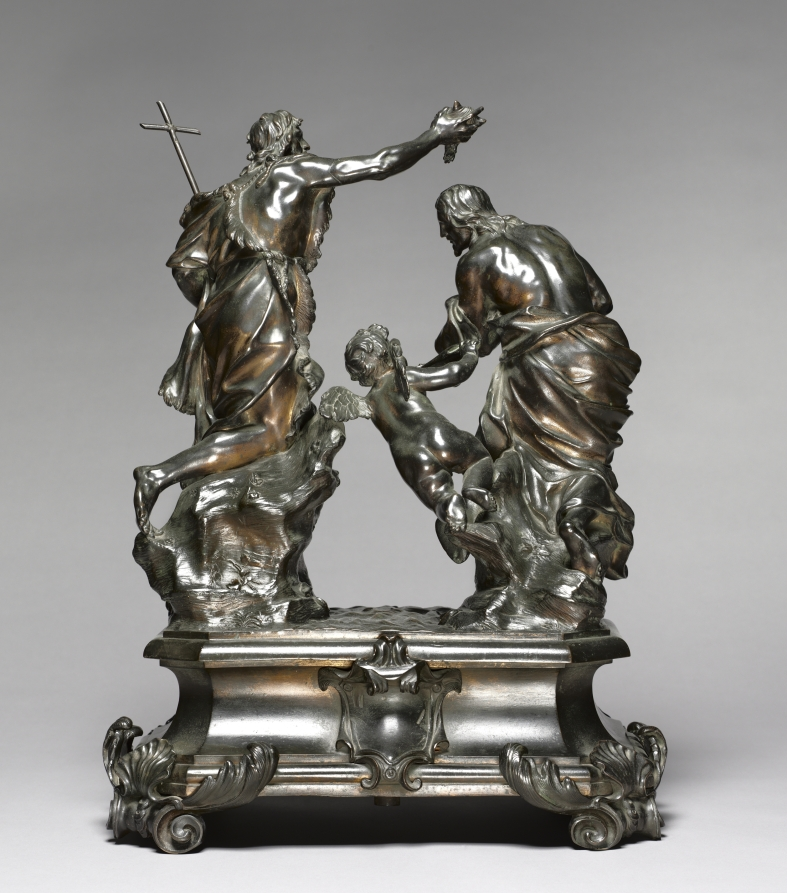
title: Baptism of Christ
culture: Italy, 17th century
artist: Alessandro Algardi (Italian, 1598–1654)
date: designed 1645–46, probably made 1650–55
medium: bronze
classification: Sculpture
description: When Innocent X (Giovanni Battista Pamphili, ruled 1644–55) became pope, Alessandro Algardi endeavored to obtain his patronage. This bronze Baptism of Christ is a casting from the molds used for an original silver sculpture that Algardi presented to the new pope to gain his support in 1646. The composition depicts an important scene in the life of Christ. On the right is John the Baptist, who pours water onto Jesus's head from a shell. As Christ bows his head to be baptized, a little angel holds the edge of his cloak. Algardi worked carefully to make this piece exciting from a number of points of view. Its dramatic emphasis shifts, depending on the viewer's vantage point.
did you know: Algardi's sculpture plays on its intended recipient's given name: Giovanni Battista (John the Baptist).